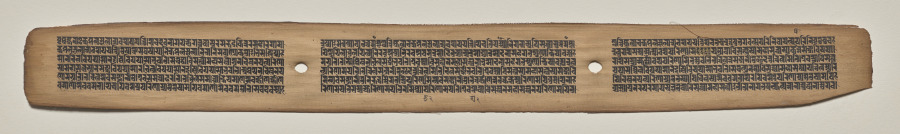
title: Text, folio 52 (recto), from a Manuscript of the Perfection of Wisdom in Eight Thousand Lines (Ashtasahasrika Prajnaparamita-sutra)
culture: Eastern India, Bihar, Vikramashila Monastery. Painting: Nepal, Kathmandu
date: Sunday, September 14, 1119 (year 239 of the Newar Samvat in the month of Ashvina)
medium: gum tempera and ink on palm leaves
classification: Painting